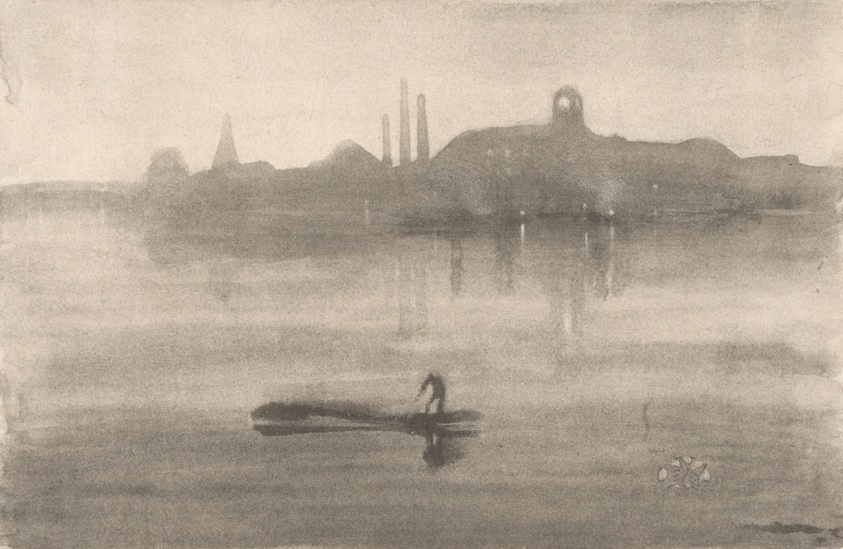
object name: Print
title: Nocturne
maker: James McNeill Whistler (American, 1834-1903)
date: 1878, published 1887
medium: Lithotint from a prepared half-tint ground, in black ink, with scraping, on blue laid chine laid down on ivory plate paper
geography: United States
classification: lithotint; lithograph; print; prints and drawing; paper